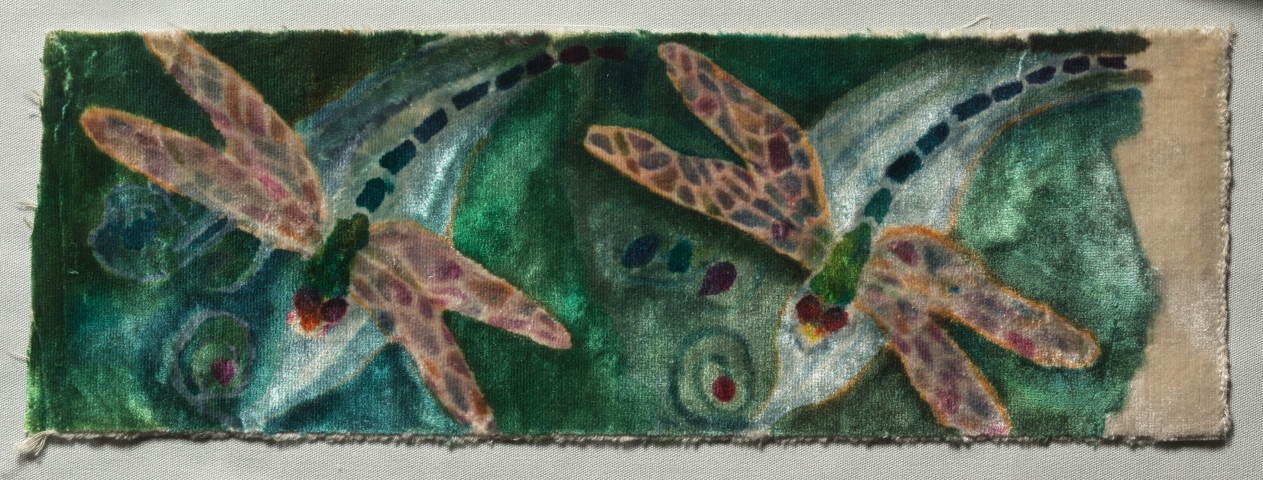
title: Stenciled Velvet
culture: America, New York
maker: Tiffany Studios (United States, New York, 1902–32)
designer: Dorothy Marshall Hornblower (American, 1886–1968)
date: c. 1902–10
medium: plain silk velvet stencilled with vegetable dyes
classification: Velvet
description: Textiles formed a large part of Louis Comfort Tiffany's artistic production, especially since he used many of them in his designs for artistic interiors. His clients included many society notables, institutions, churches, and even the White House. Tiffany employed many women artisans in his business, including Dorothy Marshall Hornblower, who oversaw the textile department and likely designed this ethereal Art Nouveau pattern.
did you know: This dragonfly design for a stenciled velvet fabric was likely used for drapery material.